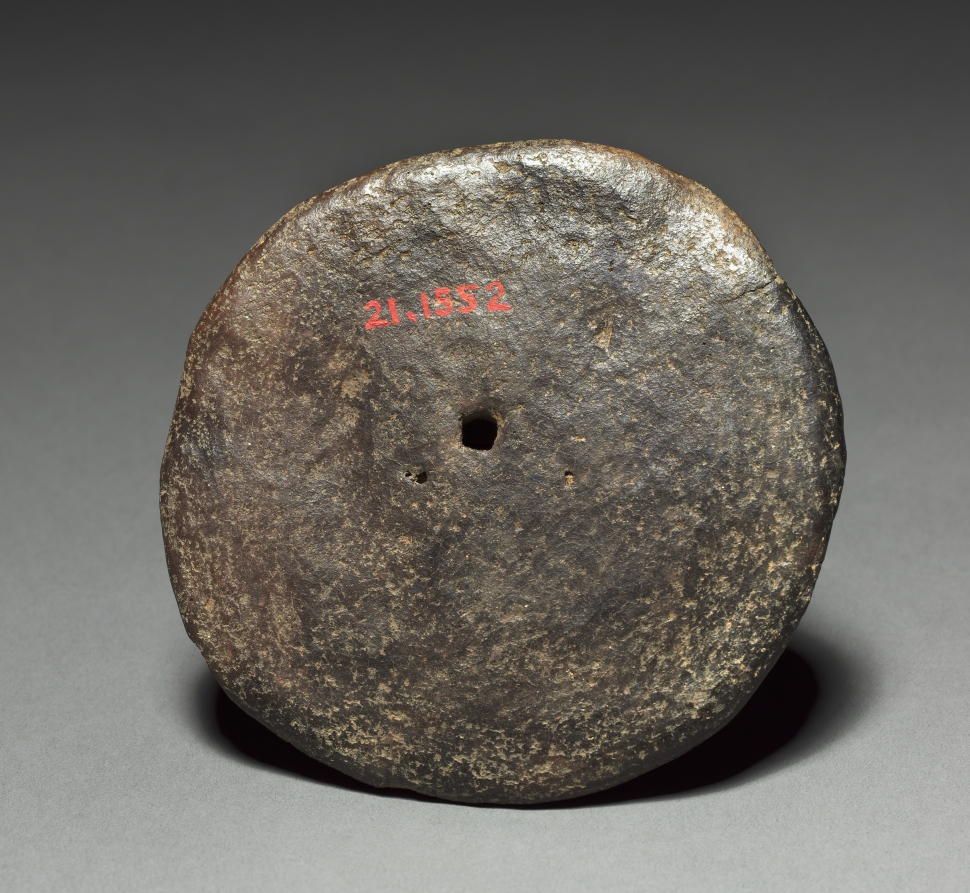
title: Weight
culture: Colombia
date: before 1921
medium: pottery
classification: Ceramic